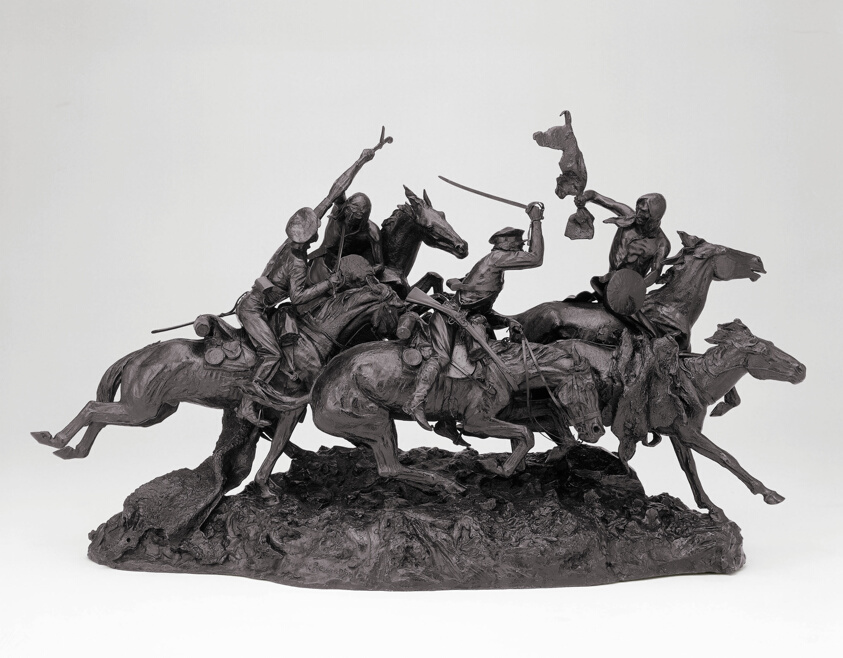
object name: Sculpture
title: The Old Dragoons of 1850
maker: Frederic Remington (American, 1861–1909); Cast by Roman Bronze Works (American, founded 1897)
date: Modeled 1905, cast 1906–7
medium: Bronze with black patina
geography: New York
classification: sculpture; american arts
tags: animals, people, portraits